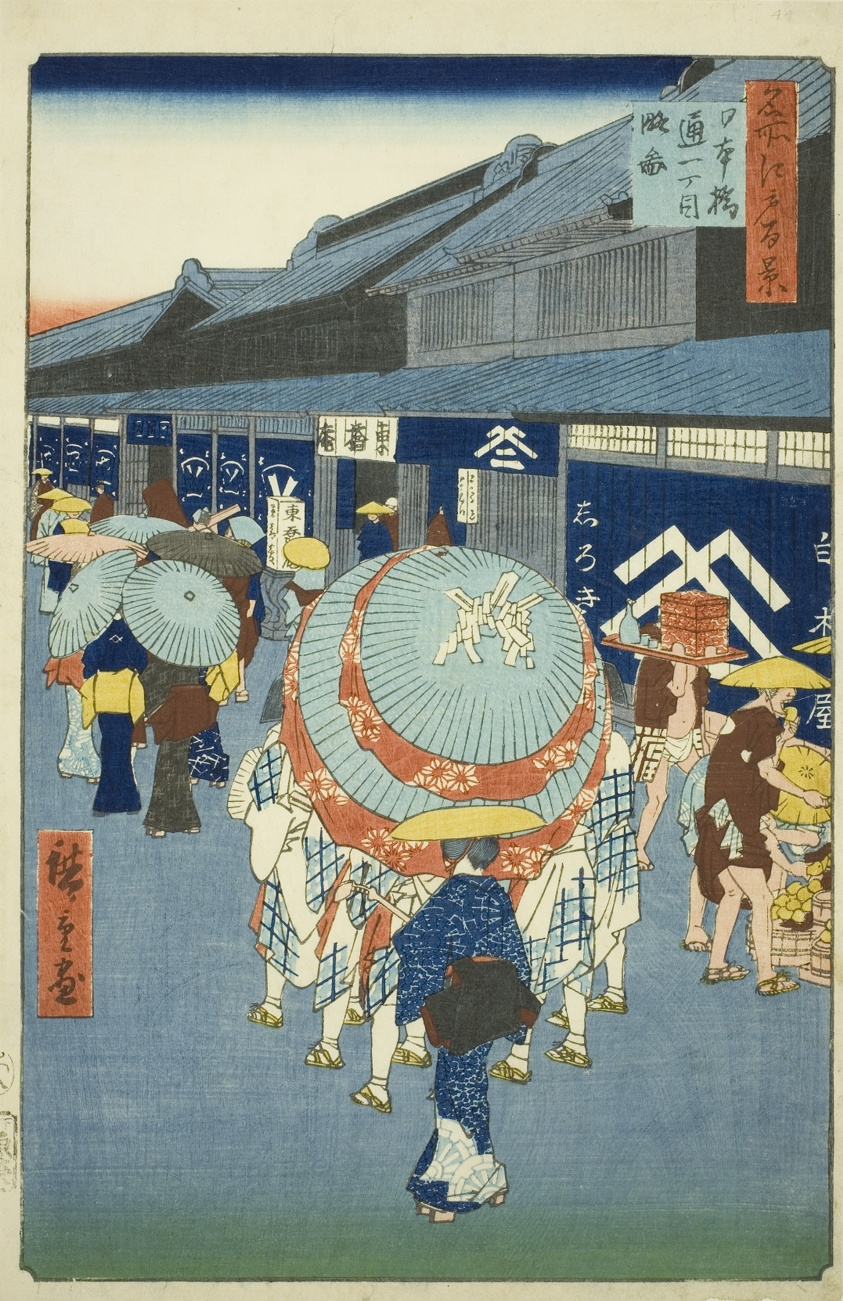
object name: Print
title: View of Nihonbashi Tori-itchome (Nihonbashi Tori-itchome ryakuzu), from the series "One Hundred Famous Views of Edo (Meisho Edo hyakkei)"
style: Japanese (culture or style)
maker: Utagawa Hiroshige 歌川 広重; Japanese, 1797-1858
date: 1858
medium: Color woodblock print; oban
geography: Japan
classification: woodblock print; print; asian art